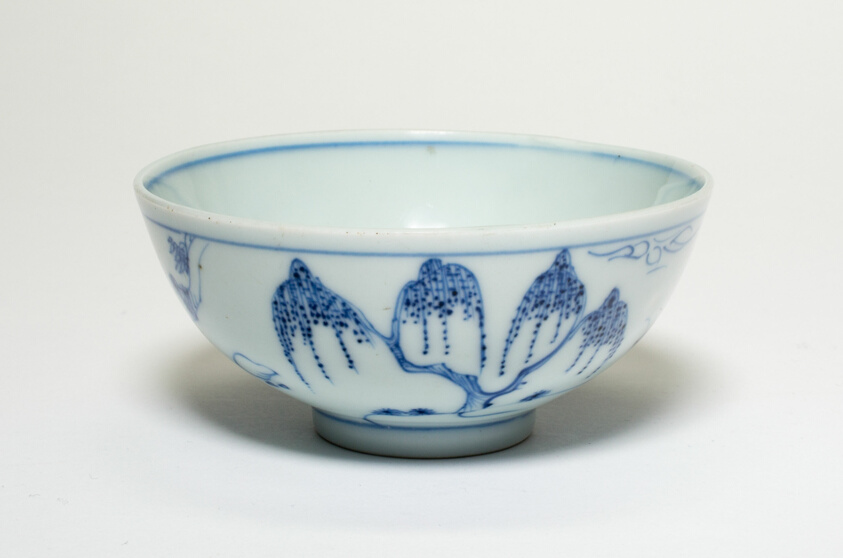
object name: Vessel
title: Bowl with Scholar and Attendant by a Willow Tree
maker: China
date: Early Qing dynasty (1644–1911), 17th/18th century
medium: Porcelain painted in underglaze blue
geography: China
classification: porcelain; asian art; ceramics